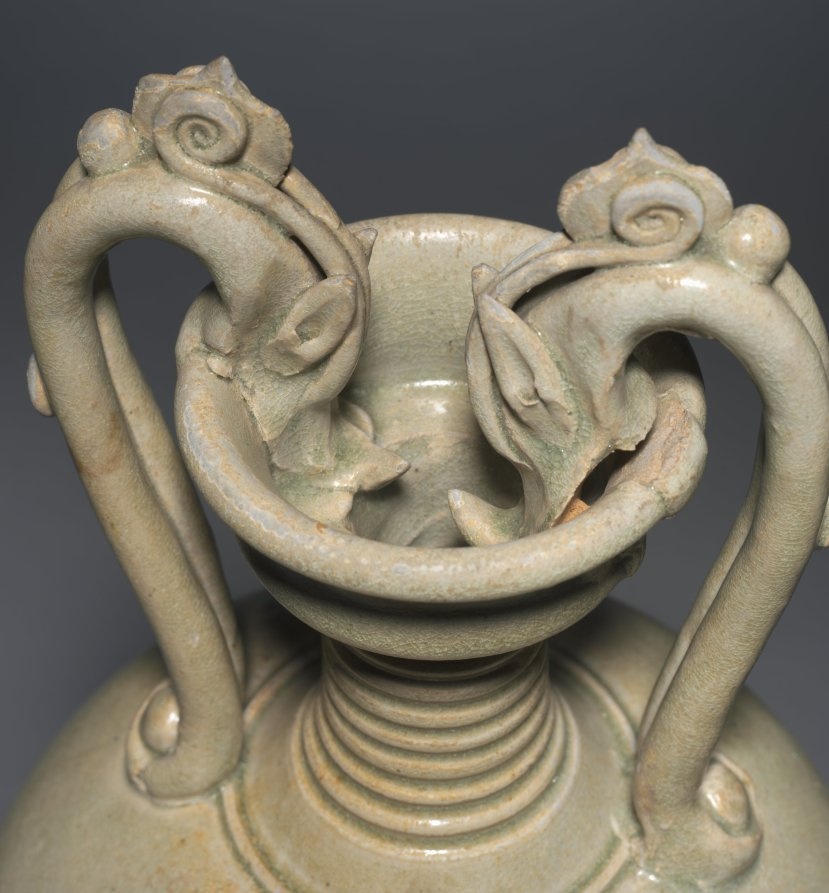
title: Jar (Amphora) with Dragon Handles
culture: China, Sui dynasty (581-618) to early Tang dynasty (618-907)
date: 600s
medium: glazed stoneware with modeled and applied decoration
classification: Ceramic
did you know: The two handles were formed by double coils of clay, which turn into dragon heads biting the vessel's rim.